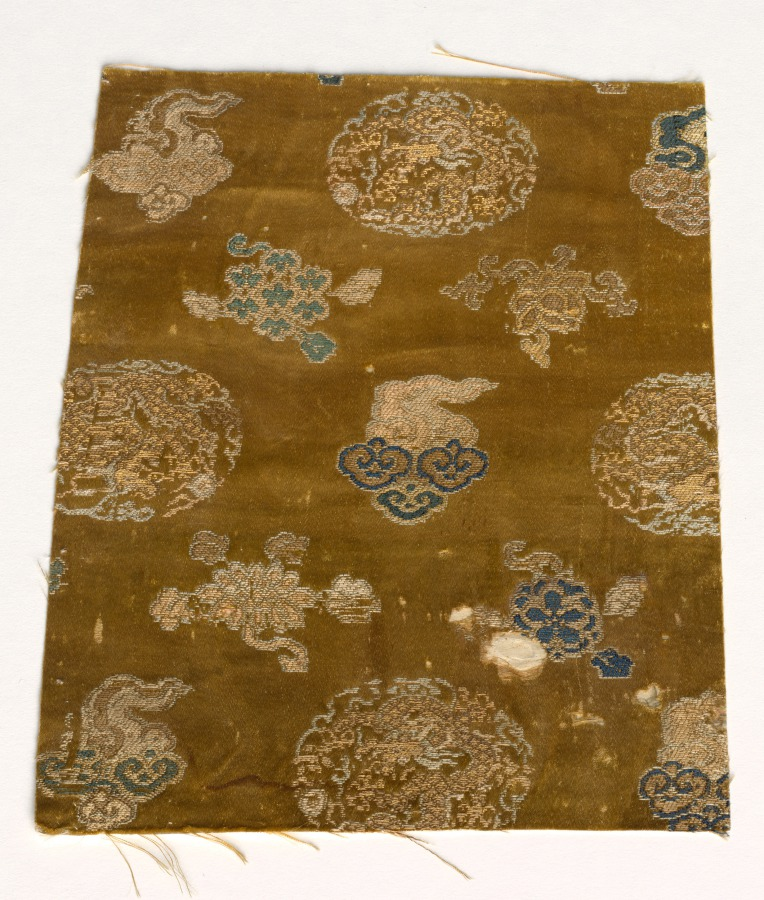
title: Fragment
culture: China, 18th century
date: 1700s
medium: brocaded satin, silk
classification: Textile